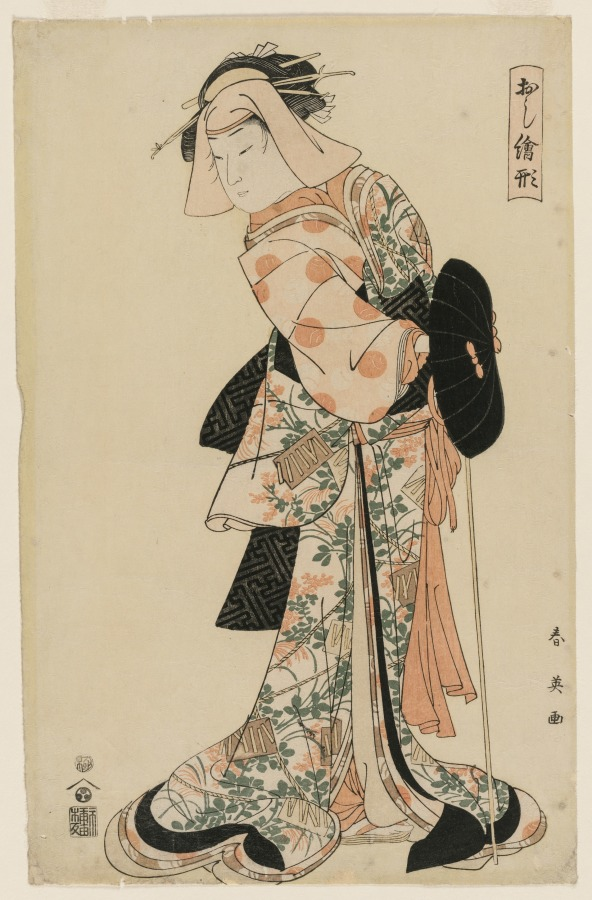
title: Dancer as Kuzunoha, Fox Spirit Disguised as a Woman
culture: Japan, Edo period (1615–1868)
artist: Katsukawa Shunei (Japanese, 1762–1819)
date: c. 1795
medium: color woodblock print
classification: Print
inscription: Signature: Shunei ga Publisher: Nishimura Yohachi (emblem, Eiju han)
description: From the series "Oshiegata" (Forms of Cloth Pictures)